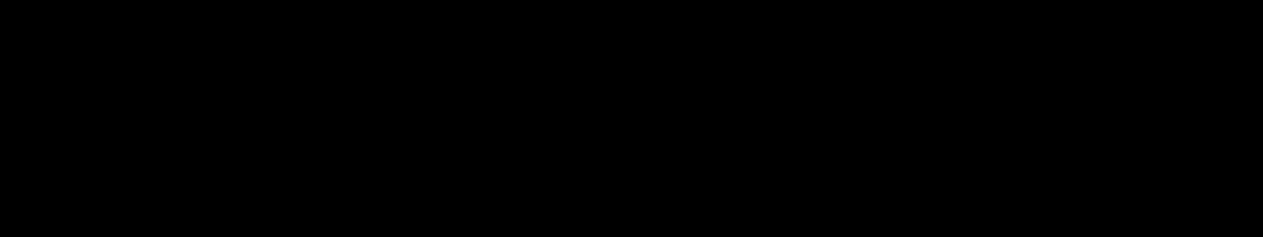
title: Old Pine Tree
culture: China, Ming dynasty (1368–1644)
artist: Wen Zhengming (Chinese, 1470–1559)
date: late 1530s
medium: handscroll; ink on paper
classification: Painting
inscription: 變化勢難縛，虬髯似戟森. 徵明 [印]文徵明印; 衡山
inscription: 2 partial seals of Qian Shisheng 錢士昇 (1575–1652)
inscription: 8 imperial seals: 6 of the Qianlong emperor (r. 1736–95); 1 of the Jiaqing emperor (r. 1796–1821); 1 of the Xuantong emperor (r. 1909–11).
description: Here the natural appearance of a gnarled and vine-entangled pine has been transformed into a rhythmic abstraction of brushstrokes and ink tonalities, with unifying opposites—opening and closing, rising and falling—that provide the design across the horizontal scroll. The artist's inscription reads: "The force of change beyond restraint; / The dragon's whiskers are likened to a forest of spears."